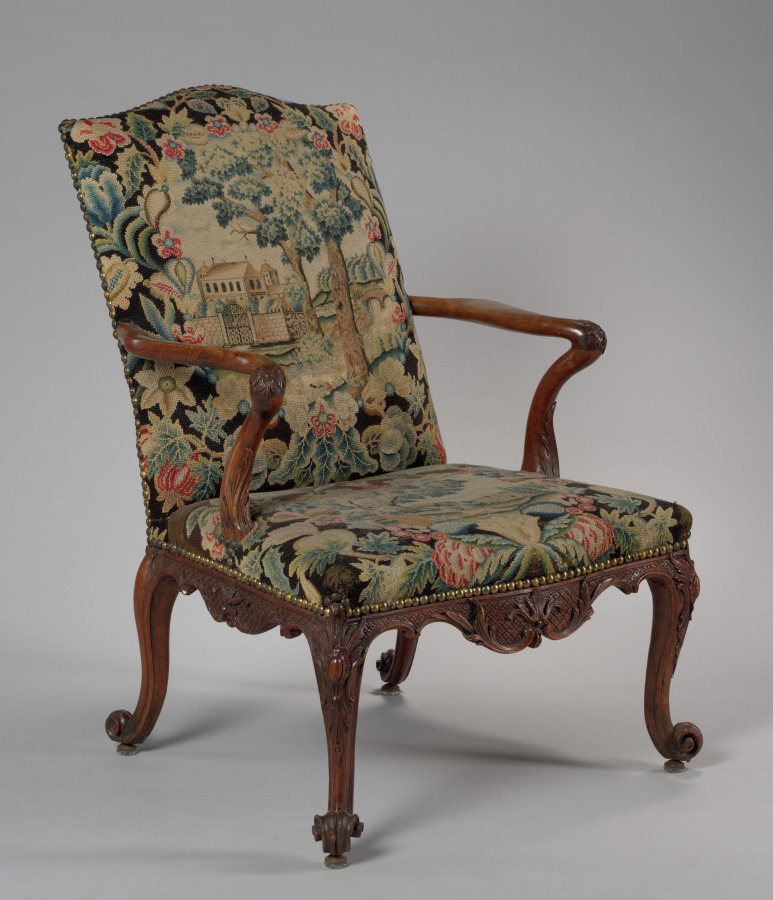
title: Armchair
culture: England, 18th century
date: 1760–1765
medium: mahogany upholstered in needlework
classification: Furniture and woodwork